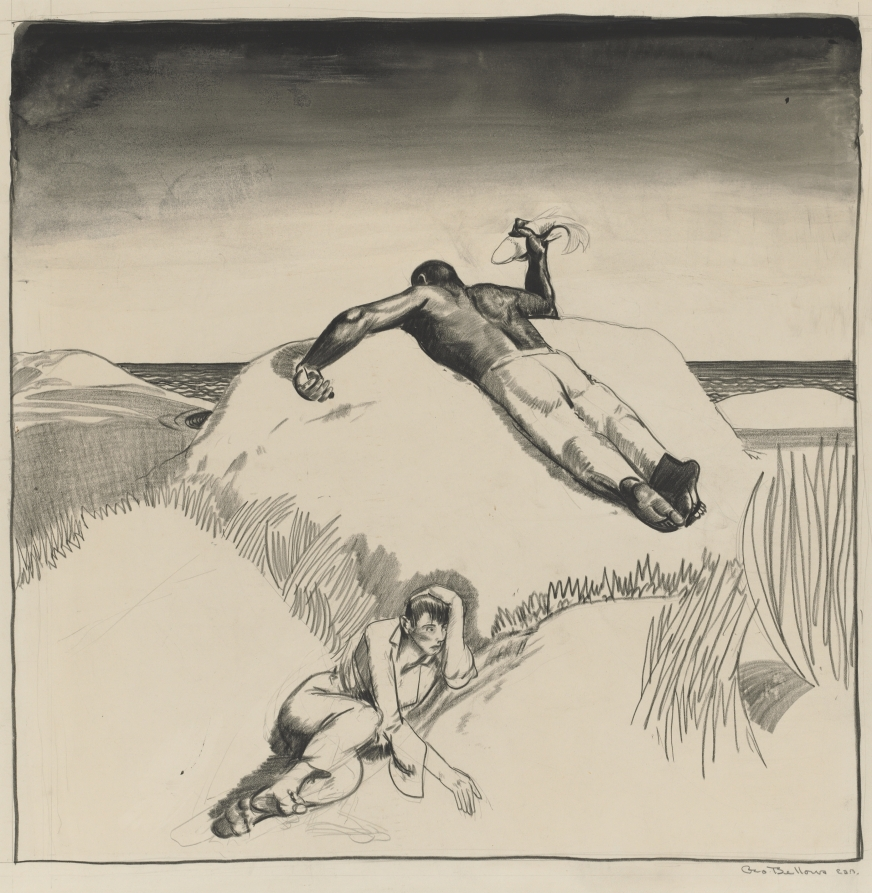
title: Figures on the Beach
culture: America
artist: George Bellows (American, 1882–1925)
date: c. 1900–1925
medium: black crayon and ink with pencil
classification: Drawing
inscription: Signed in pencil at lower right: "Geo Bellows E.S.B."